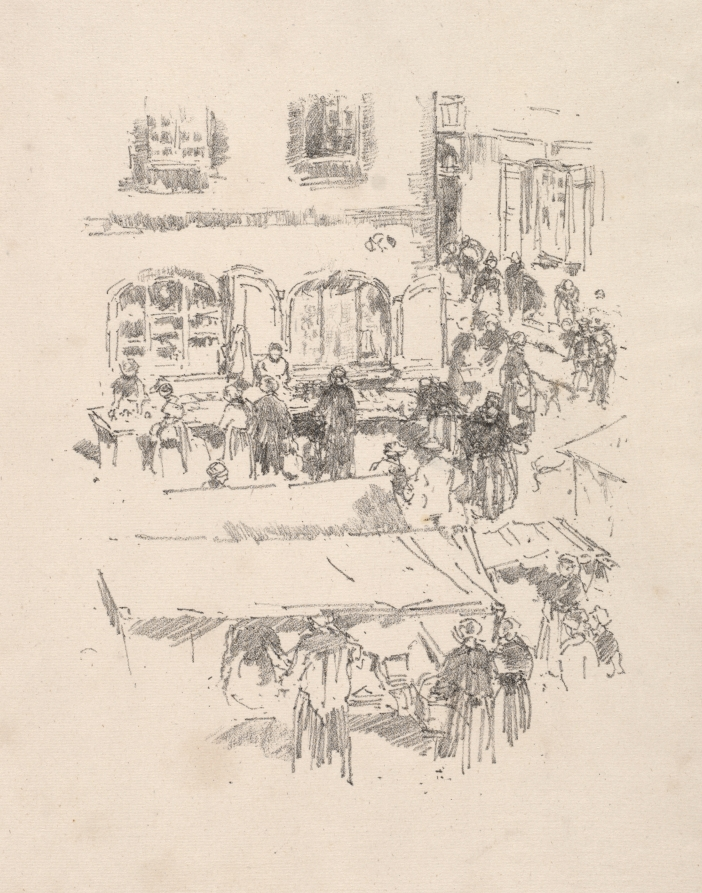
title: The Market Place, Vitre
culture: America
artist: James McNeill Whistler (American, 1834–1903)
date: 1893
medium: lithograph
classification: Print